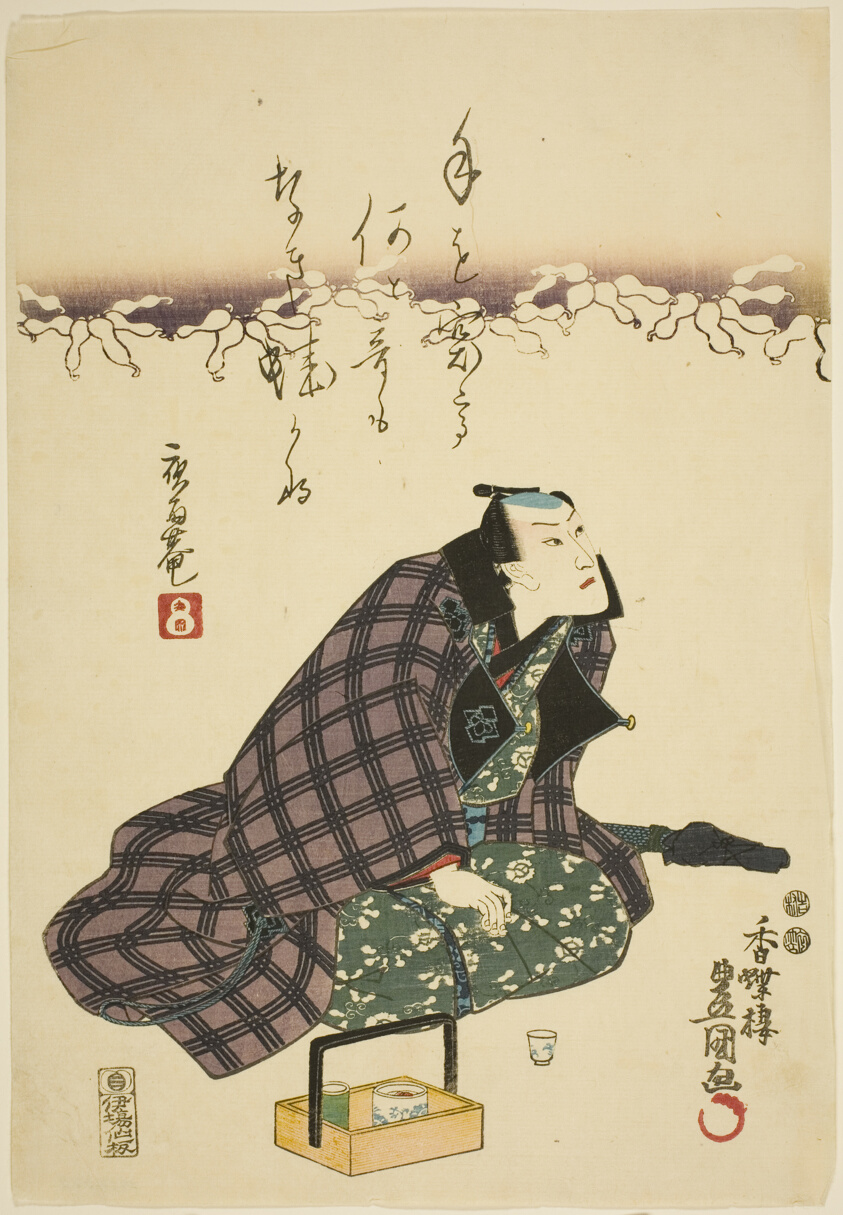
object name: Print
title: The actor Ichikawa Danjuro VIII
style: Japanese (culture or style)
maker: Utagawa Kunisada I (Toyokuni III) (Japanese, 1786–1864)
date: 1849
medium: Color woodblock print; left sheet of oban diptych (right: 1937.272a)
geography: Japan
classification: woodblock print; print